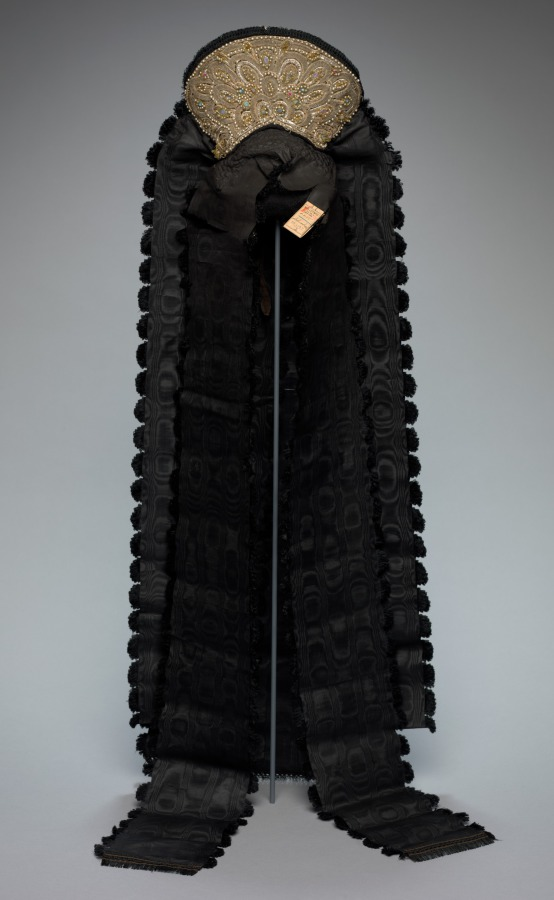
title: Headdress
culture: Germany, Swabia, 18th century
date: 1700s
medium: embroidery, decorated with silver thread, imitation pearls, colored stones, and streamers of moiré ribbon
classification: Garment